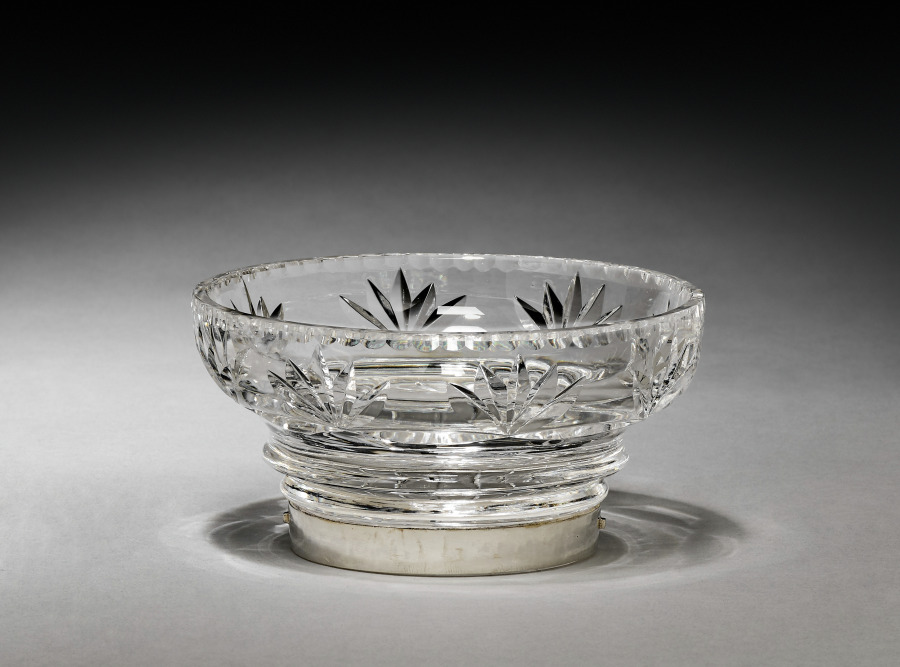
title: Compote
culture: Russian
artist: House of Fabergé (Russian, 1842–1918)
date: c. 1890–99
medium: glass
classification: Silver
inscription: Inscribed “K. Fabergé” in Cyrillic, surmounted by the double-headed Imperial eagle.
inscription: “88” silver standard